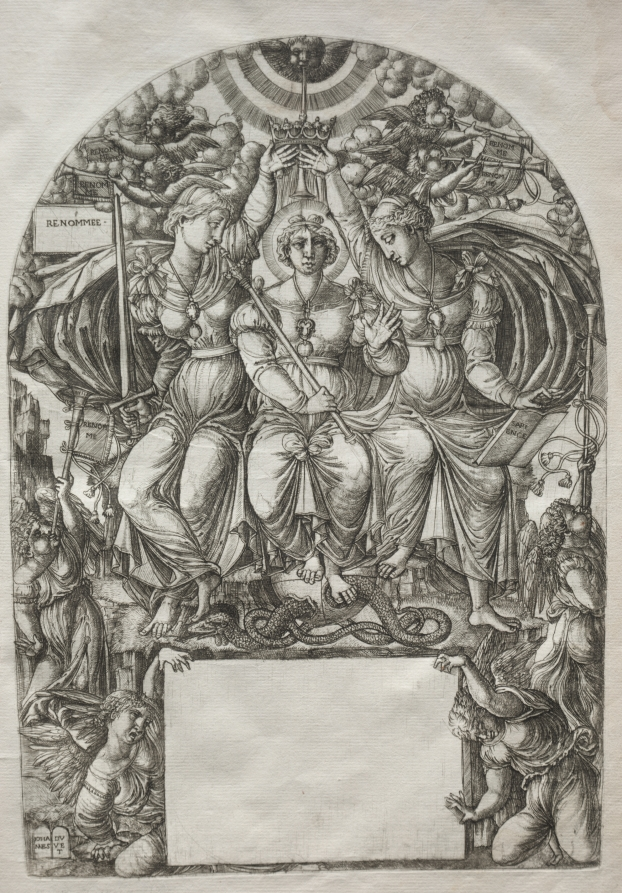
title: The Royal Majesty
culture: France, 16th century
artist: Jean Duvet (French, 1485–1561)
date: before 1561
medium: engraving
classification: Print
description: This print is part of a bound volume of works illustrating the a narrative of the Apocalypse, taken from the Revelation of Saint John in the Bible. The 23 engravings in the series occupied the artist for a number of years and represent his greatest artistic achievement. The museum's volume is one of only seven known complete sets. Jean Duvet was one of the first major printmakers in France and one of the most original artists of the 1500s. Although he worked mostly in the provincial city of Langres, he became aware of Italian art through the circulation of prints—notably those of Marcantonio Raimondi. His solidly modeled human figures reflect the influence of the Italian High Renaissance. Duvet, however, developed an idiosyncratic, highly artificial style with crowded compositions that ignore rational space in favor of ornamental surface patterns.